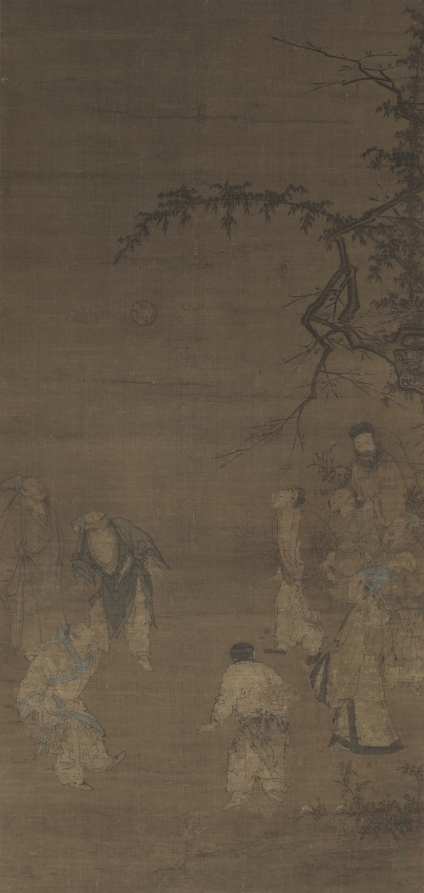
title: The Football Players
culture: China, Southern Song dynasty (1127-1279)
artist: attributed to Ma Yuan (Chinese, c. 1150–after 1255)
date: c. late 1100s–1st quarter 1200s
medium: Hanging scroll; ink and light color on silk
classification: Painting